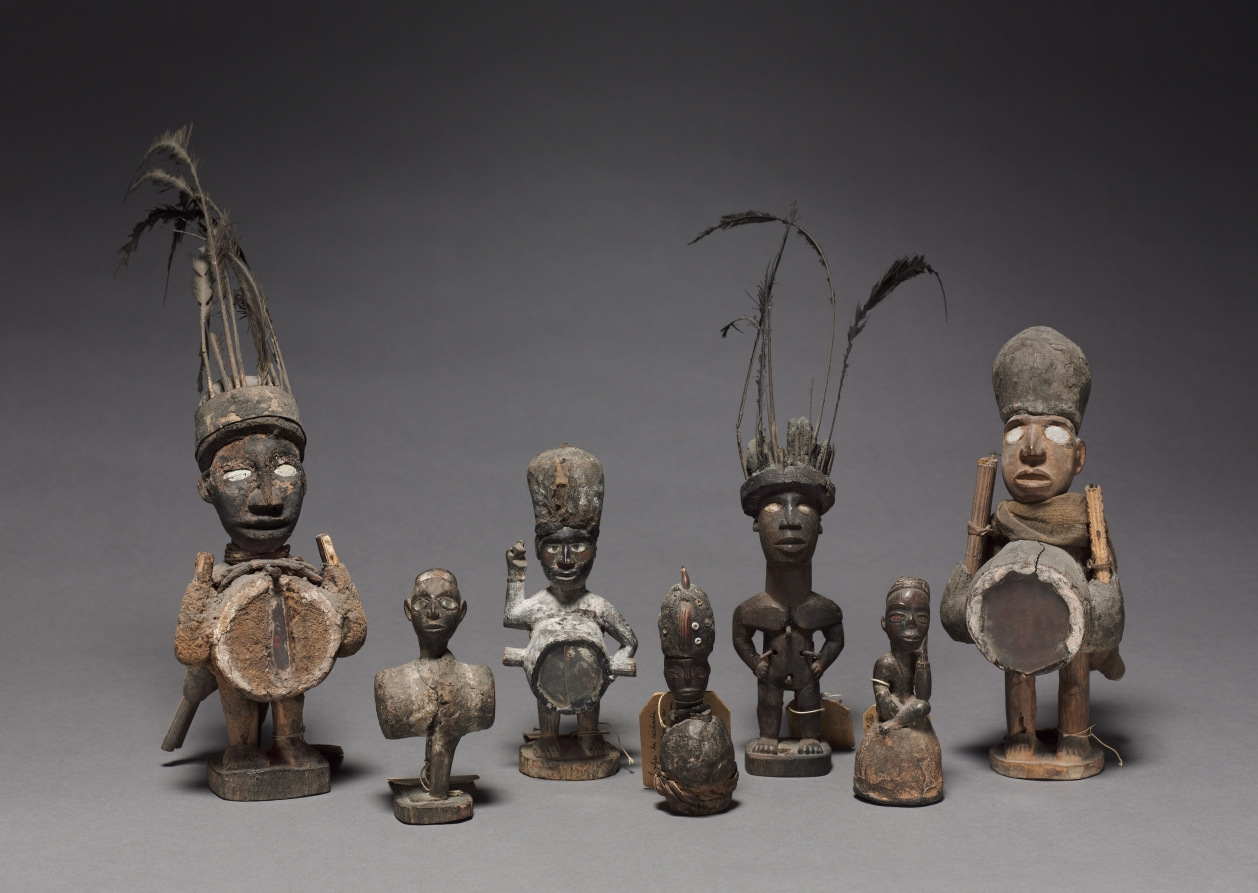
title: Power figure (nkisi)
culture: Africa, Central Africa, Republic of the Congo, Kongo-style maker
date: late 1800s-early 1900s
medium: Wood, organic materials (including resin), cloth, glass, and various other materials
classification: Sculpture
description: One of seven anthropomorphic figurines, these minkisi contained medicines in which an ancestral spirit was believed to reside. The medicines served a metaphorical rather than literal purpose in the resolution of conflicts among Kongo people. This asymmetrical figure wears a mpu headdress of chiefs with its characteristic geometric decoration. The pose may refer to a state of mourning.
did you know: Different from other Minkisi who hold their power in their abdomen, this figure sits atop a sphere in which the active substances still reside.